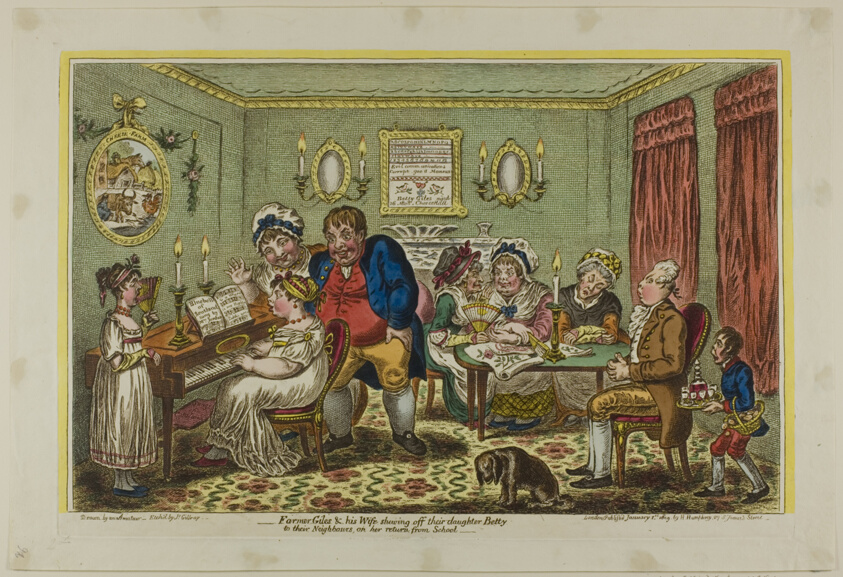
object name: Print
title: Farmer Giles & His Wife Shewing off their Daughter Betty to their Neighbors, on her Return from School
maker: James Gillray (English, 1756-1815); published by Hannah Humphrey (English, c. 1745-1818)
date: published January 1, 1809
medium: Hand-colored etching on paper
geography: England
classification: etching; print; prints and drawing